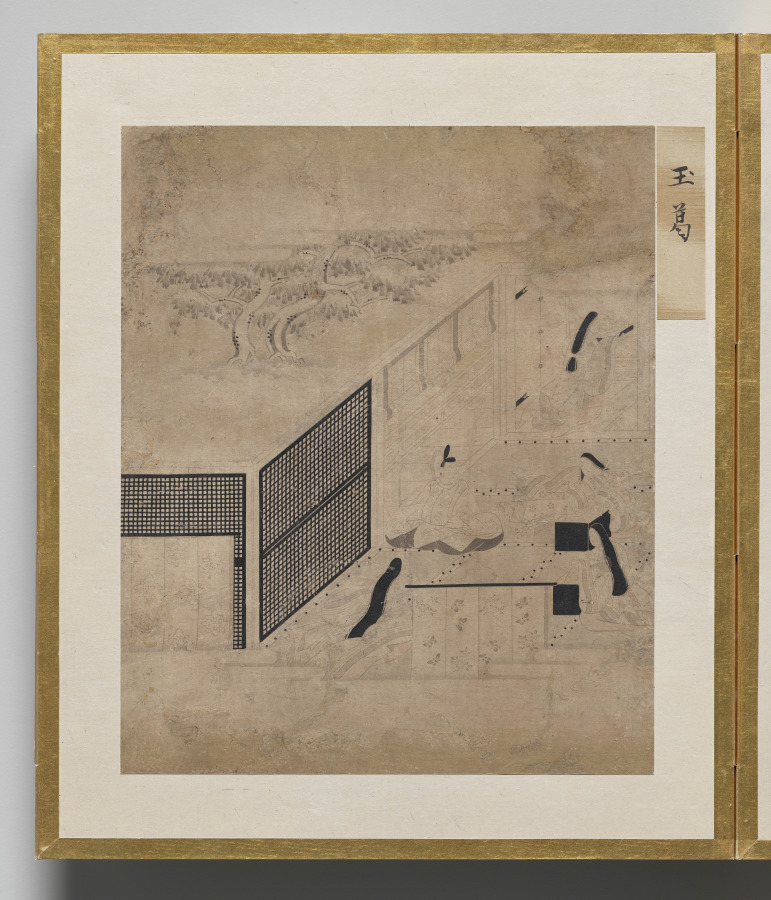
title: Jeweled Chaplet from Album of Illustrations for the Tale of Genji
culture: Japan, Edo period (1615–1868)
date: 1600s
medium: painting in an accordion-style album; ink, light color, and gold on paper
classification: Bound Volume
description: This album contains illustrations for the classic literary work the Tale of Genji, authored in the 1000s by Murasaki Shikibu, an aristocrat of the Heian period (794–1185) court. The scenes are painted in the “white drawing” (hakubyō) mode, in which a fine ink line is used to depict figures and spaces with great subtlety, punctuated only occasionally by traces of red pigment for a character’s lips, a detail of a garment, or a decorative element. These two scenes illustrate episodes from the chapters “Thin Veil of Cloud” (Usugumo) and “Barrier Gate” (Sekiya).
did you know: The illustrations are identified by chapter title in cartouches to the upper right of the paintings.